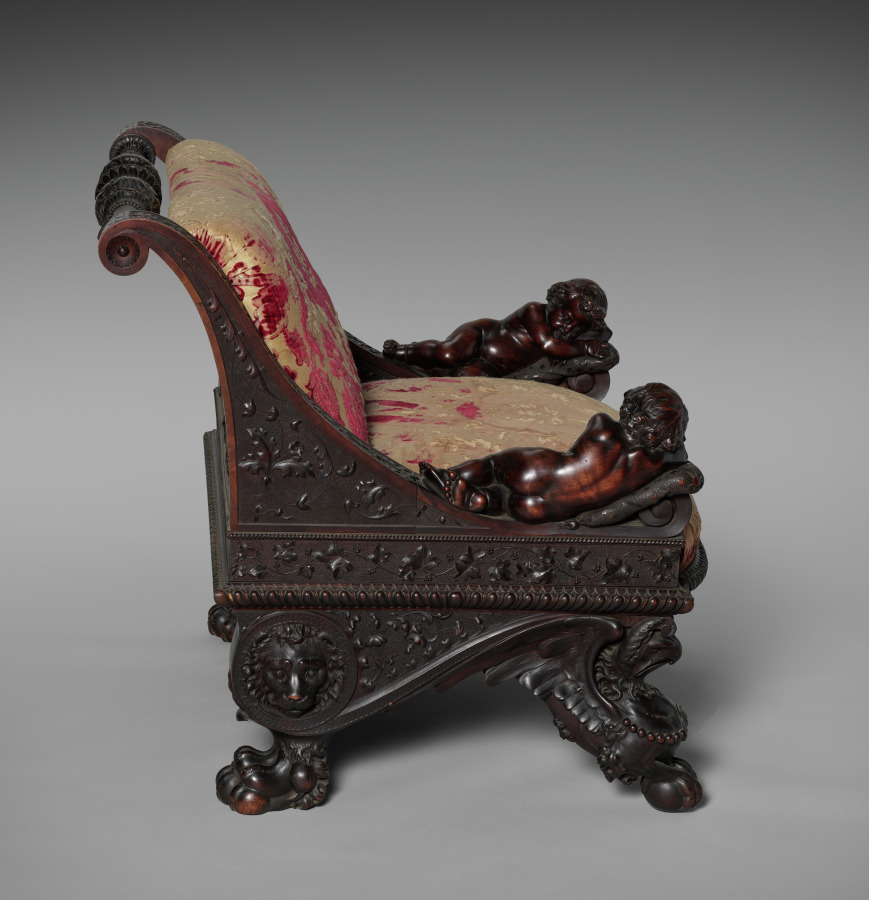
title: Armchair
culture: Italy, Florence, 19th century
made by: Luigi Frullini (Italian, 1839–1897)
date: 1876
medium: walnut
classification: Furniture and woodwork